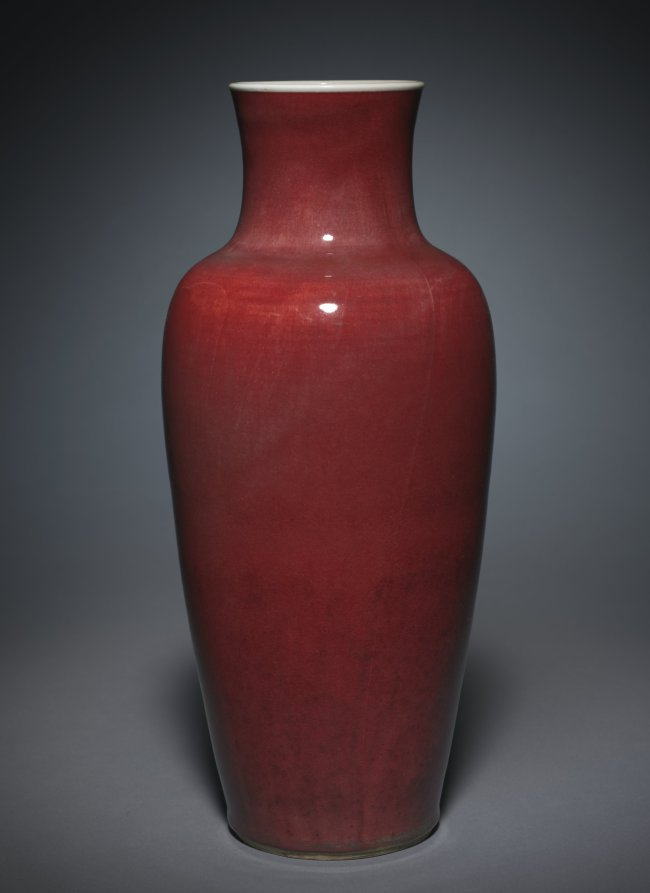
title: Vase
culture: China, Jiangxi province, Jingdezhen, Qing dynasty (1644-1911), Kangxi mark and period (1662-1722)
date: 1662–1722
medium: porcelain with "ox-blood" glaze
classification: Ceramic